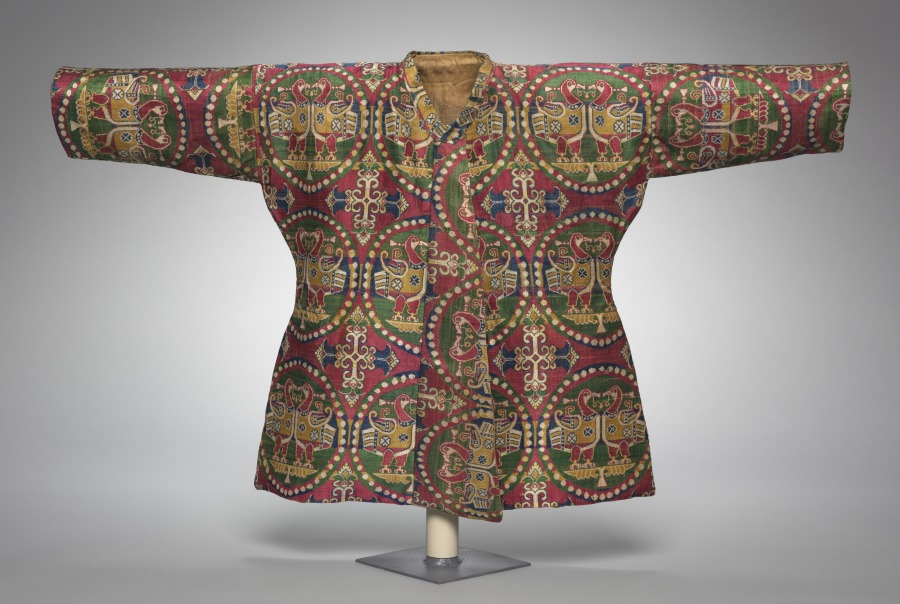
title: A Child’s Coat with Ducks in Pearl Medallions and a Child's Pants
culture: Iran or Central Asia, Sogdiana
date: 700s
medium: silk; weft-faced compound twill, samit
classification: Garment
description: This luxurious silk coat for a young prince displays ducks in pearl roundels alternating with cross-shaped lotus blossoms woven in five radiant colors of silk. The ducks are adorned with imperial motifs adopted from the previous Sasanian dynasty in Iran including pearl collars, flying ribbons, and a jeweled necklace in their beaks. This silk was woven in Iran or Sogdiana; however, it is lined with Chinese silk damask and has a pair of pants also made with Chinese silk damask, both decorated in an 8th-century style of the Tang Dynasty.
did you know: Given the coat’s pristine condition, it is unclear whether it was ever worn, or if it was used instead as a diplomatic gift or perhaps as currency.